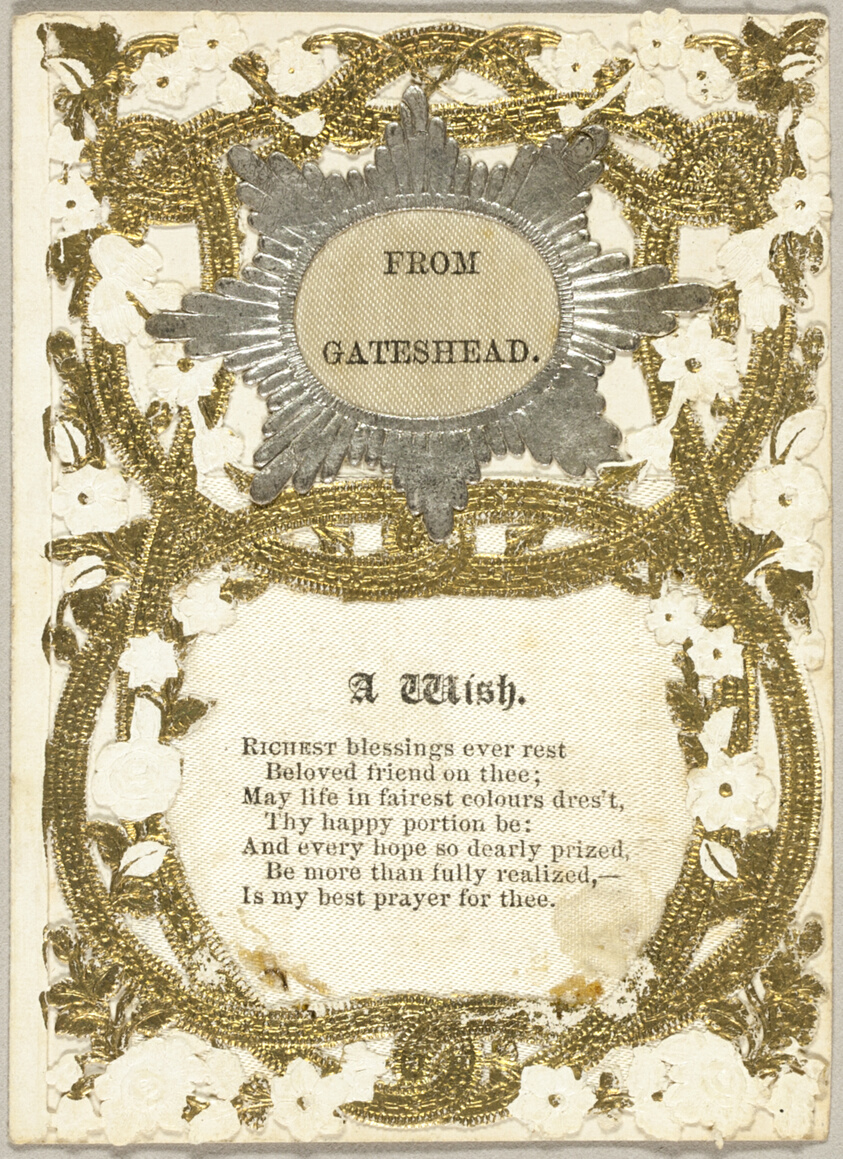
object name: Drawing and Watercolor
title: From Gatehead (valentine)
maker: Unknown Artist; American or English, 19th century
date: 1860/69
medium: Collaged elements and gold and silver paint on cut and embossed ivory wove paper (lace)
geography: United States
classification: collage; valentine; prints and drawing; paper